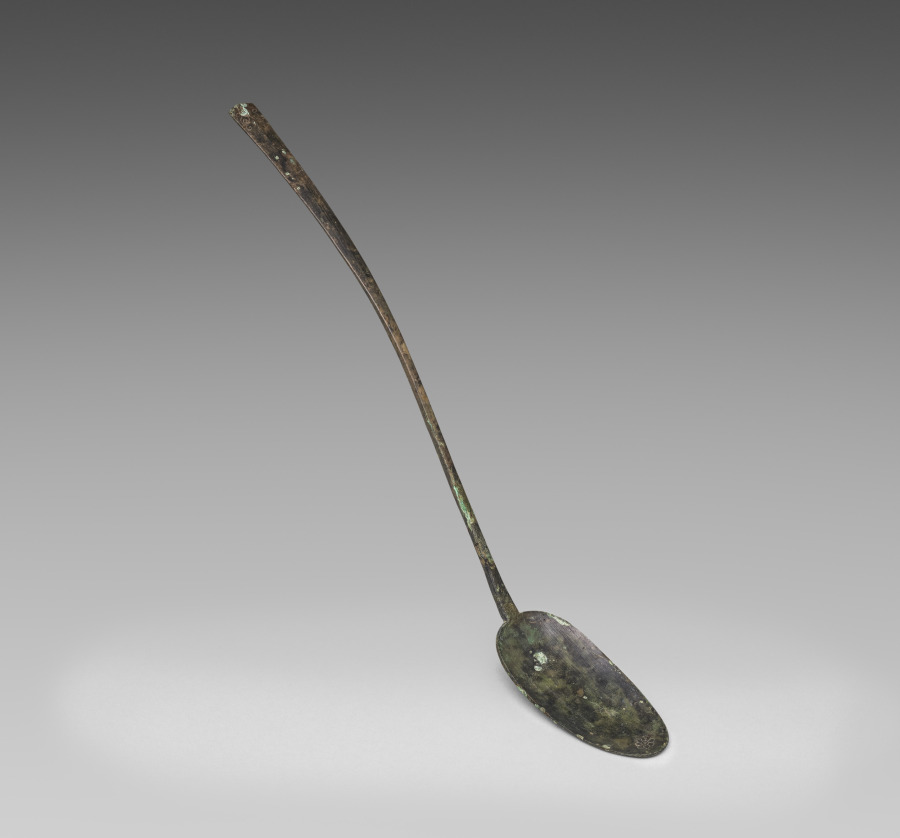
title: Spoon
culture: Korea, Goryeo dynasty (918–1392)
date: 918–1392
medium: silver bronze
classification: Metalwork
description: Celadons, spoons, seals, and bronze mirrors were the most common burial objects in tombs during the Goryeo period (918–1392). Furnishing tombs with an elaborate assemblage of objects was believed to honor and comfort the newly dead. Generally, Goryeo tombs were left untouched until the late 19th century. During the colonial period (1910–45), however, Japanese archaeologists hastily excavated the tombs located in Kaeseong, the former capital of the Goryeo period. Scholars recently have proposed that toward the end of the 14th century, Koreans enjoyed meat-based soups more than any other dishes, explaining why many more spoons than chopsticks were buried in tombs.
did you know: Bronze spoons are the most common burial item. Scholars have proposed that toward the end of the 14th century, Koreans enjoyed meat-based soups more than any other dishes, explaining why spoons became common household items as well as burial goods.